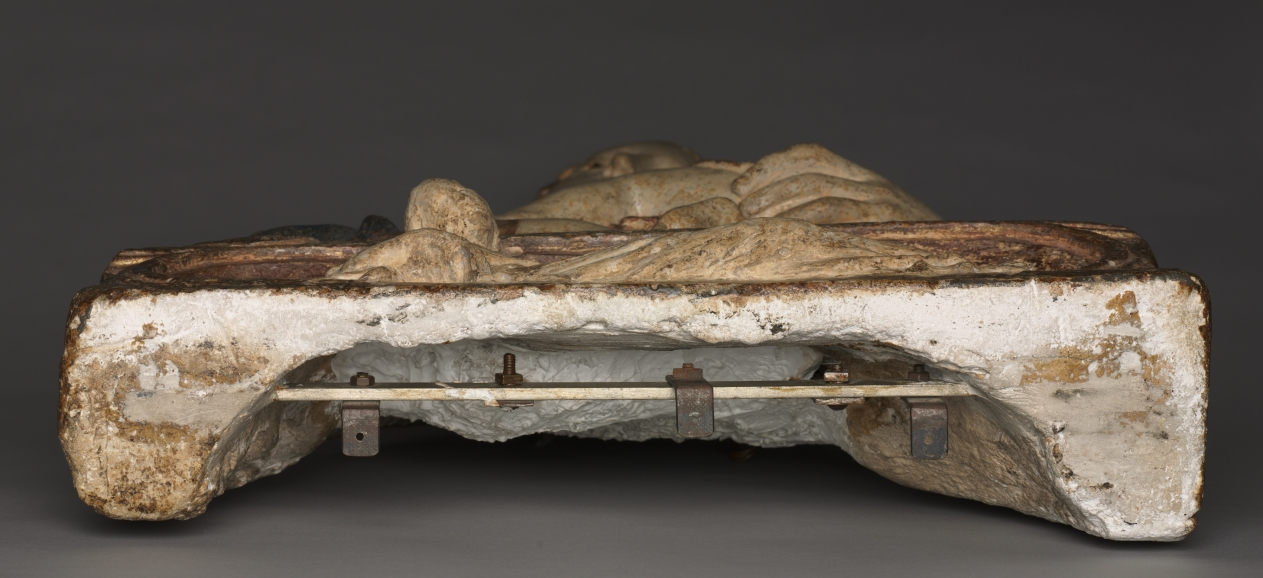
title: Madonna and Child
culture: Italy, Florence, 15th century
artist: circle of Lorenzo Ghiberti (Italian, 1378–1455)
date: c. 1450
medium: polychromed terracotta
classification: Sculpture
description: This half-length Madonna represents one of the finest of about 40 surviving variants, all of which display many characteristics of the Florentine bronze sculptor Lorenzo Ghiberti. These features include serene facial types with narrow eyes and thin eyebrows, the careful arrangement of the Madonna and Child, forehead to cheek, and the infant's twisting pose. The popularity of this devotional relief began around 1420 and continued until around 1500. Ghiberti was the most successful bronze sculptor of the early Renaissance in Florence. His fame rests upon the commissions he received for two sets of bronze doors, completed between 1401 and 1424, for the Baptistry in Florence. The reclining figure of Eve on the base of this Madonna and Child (suggesting Mary as the new Eve) stems from a similar figure on the upper left door of the Porta del Paradiso, the second set of Baptistry doors. Eve's presence on the base clearly substantiates the attribution to Ghiberti and helps date the relief.